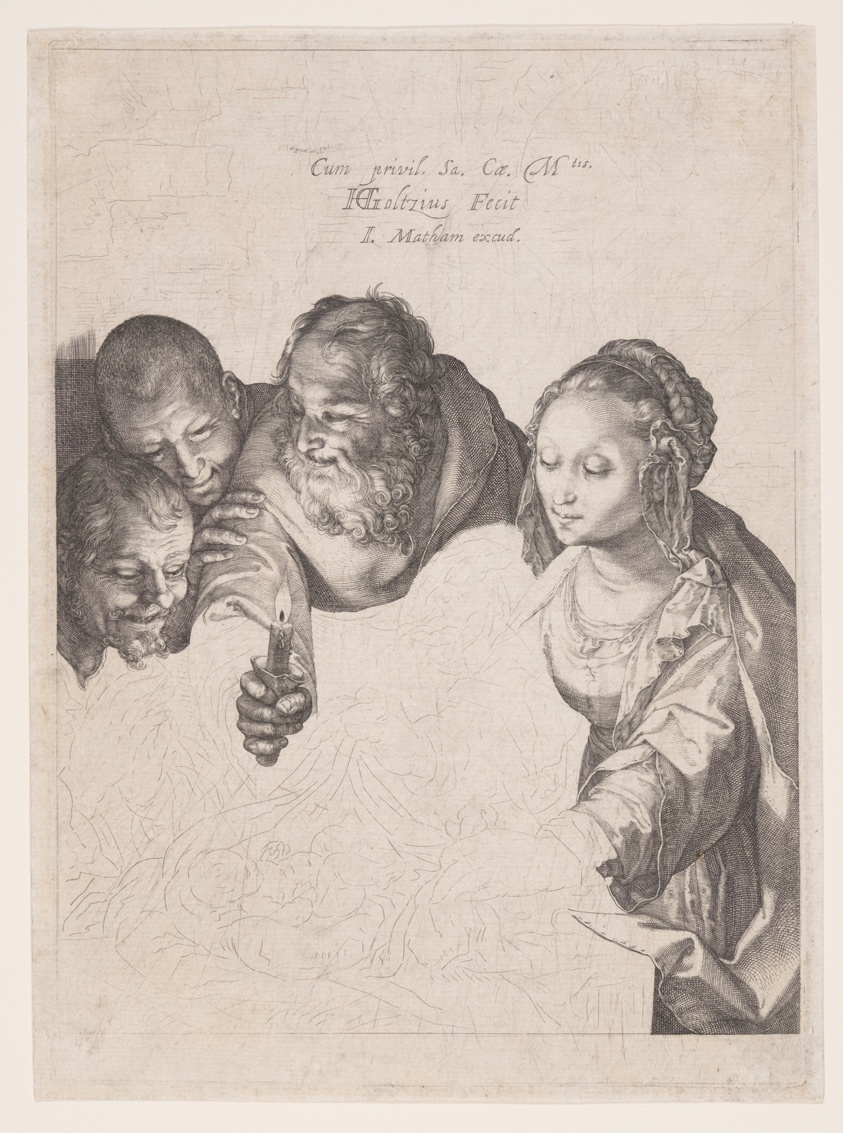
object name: Print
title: The Adoration of the Shepherds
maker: Hendrick Goltzius (Dutch, 1558–1617)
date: c. 1599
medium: Engraving on laid paper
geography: Netherlands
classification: engraving; paper; print; prints and drawing